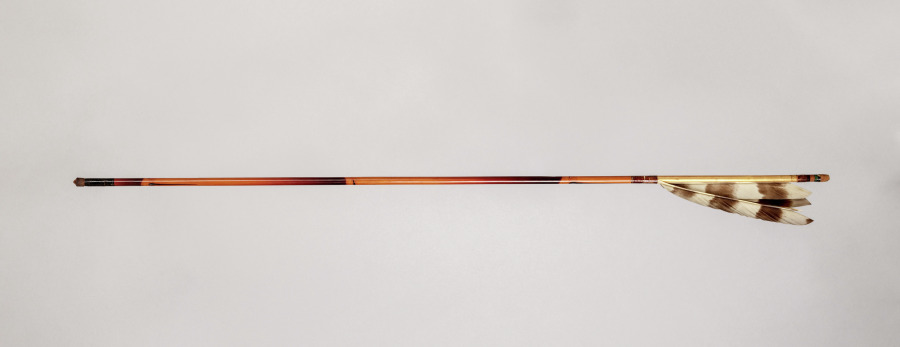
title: Arrow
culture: Japan, Edo period (1615–1868) to Meiji period (1868–1912)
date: 1800s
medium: bamboo shaft tipped with metal point and heeled with feathers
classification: Arms and Armor